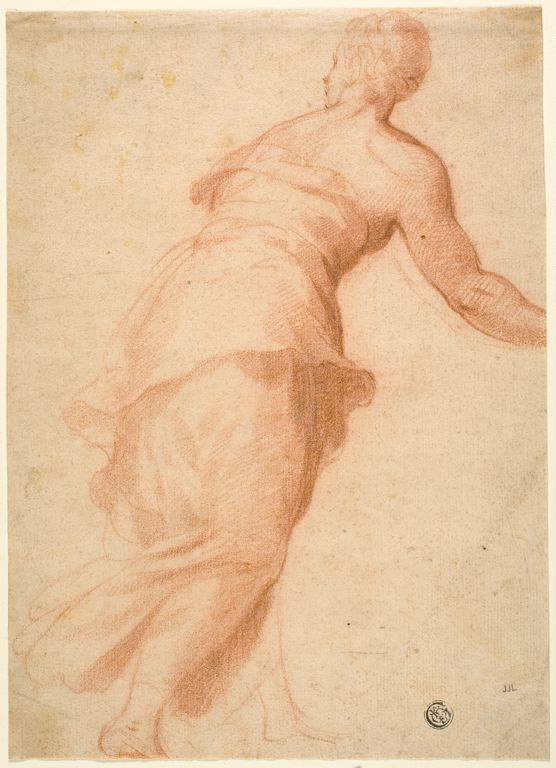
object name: Drawing and Watercolor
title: Story of Niobe: Woman Turning Left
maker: Circle of Bernardino India (Italian, 1528-1590); or after Polidoro da Caravaggio (Italian, c. 1499-c. 1543); or Circle of Francesco Salviati (Italian, 1510-1563); or Follower of Fiorentino Rosso (Italian, 1494-1540)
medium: Red chalk on buff laid paper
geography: Italy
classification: chalk; drawings (visual works); prints and drawing